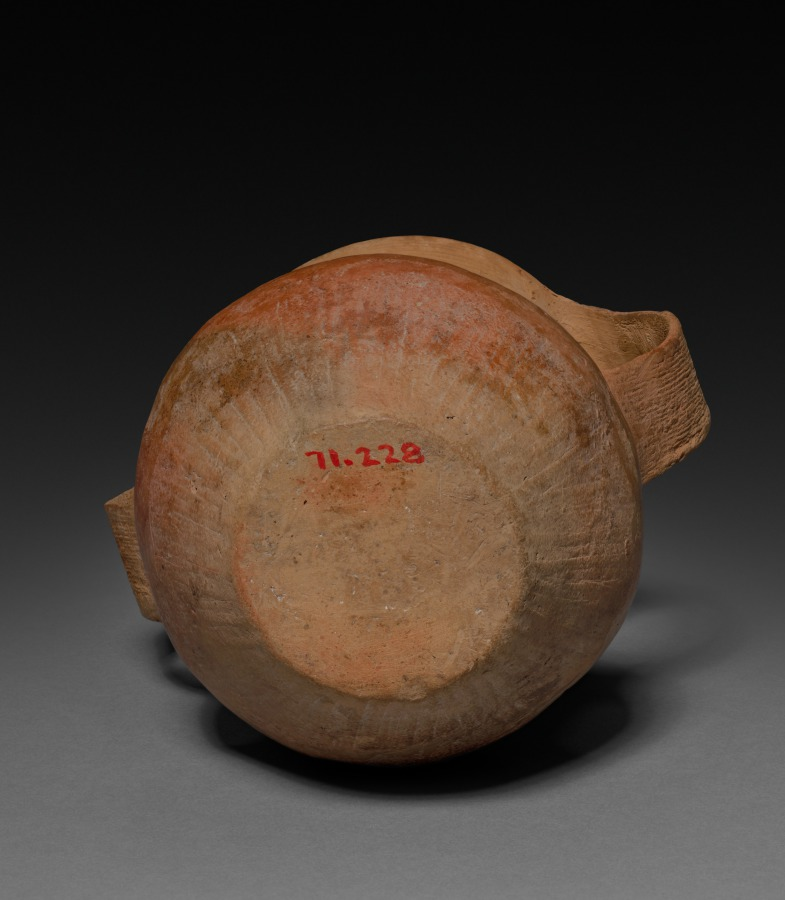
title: Double-Handled Beaker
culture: China, type-site at Qijiaping, Gansu province, Neolithic period, Qijia Culture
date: c. 2000–1500 BCE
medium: burnished earthenware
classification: Ceramic